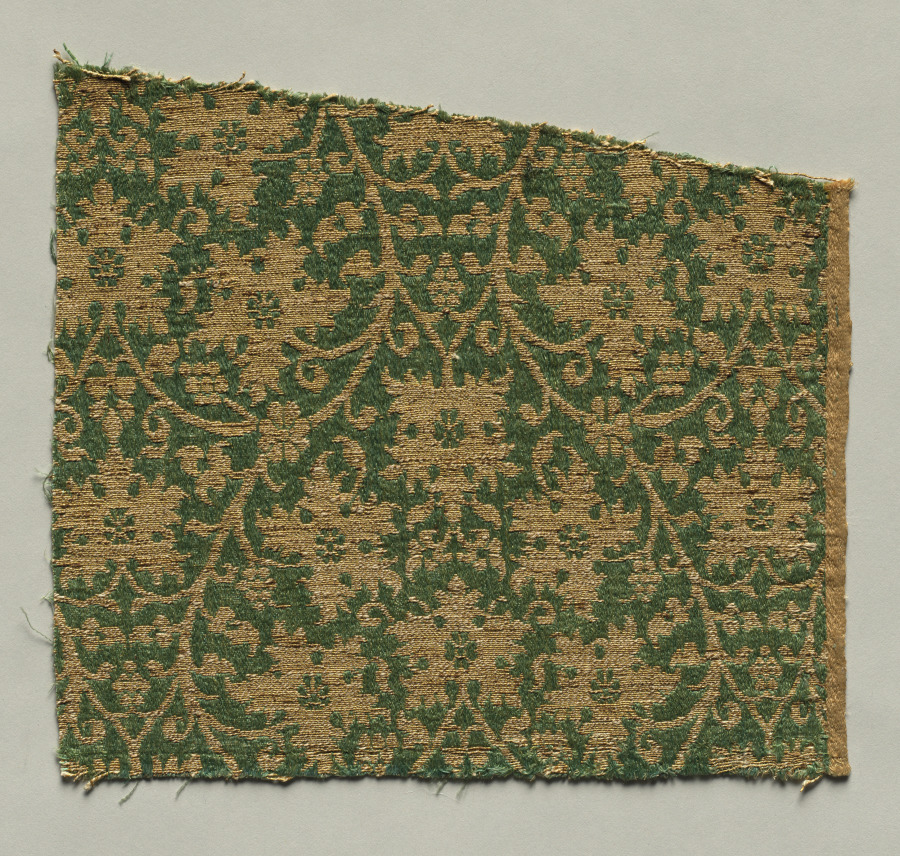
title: Lampas with scrolling vines and grape leaves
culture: probably Iran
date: 1300s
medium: lampas: silk and gold thread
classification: Textile